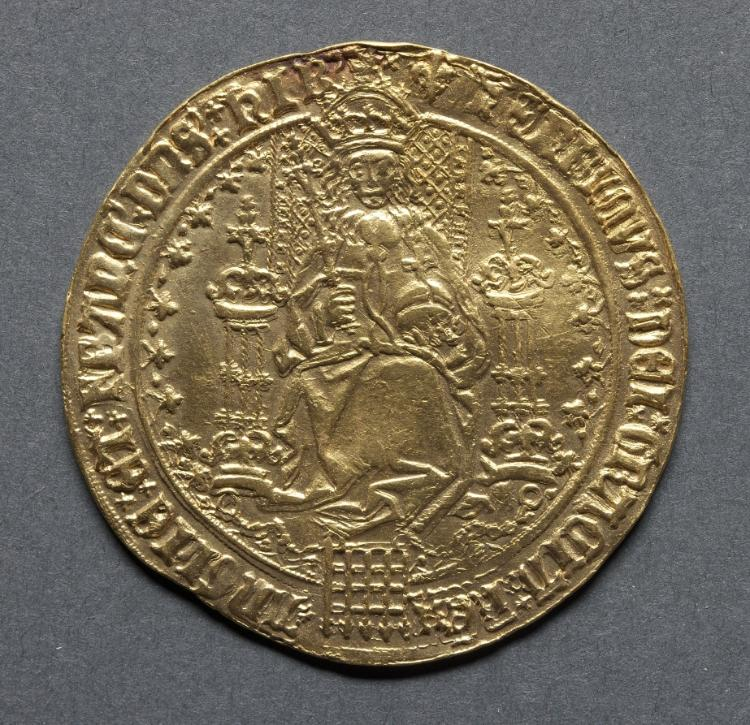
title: Sovereign: Henry VIII Enthroned (obverse)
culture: England, Henry VIII, 1509-1547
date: 1526–1544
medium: gold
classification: Coins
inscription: henricvs dei gracia rex anglie et franc dns hib